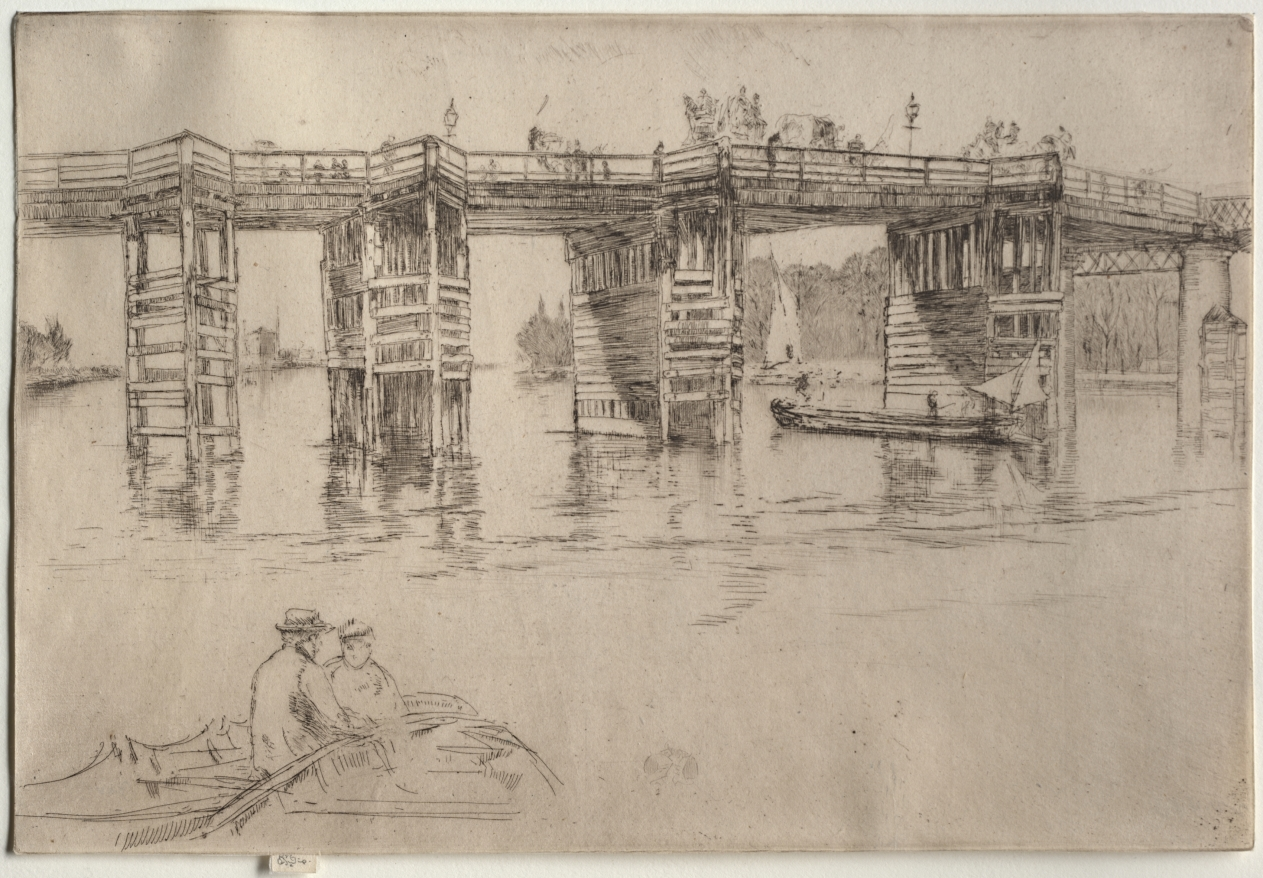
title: Old Putney Bridge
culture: America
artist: James McNeill Whistler (American, 1834–1903)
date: 1879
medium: etching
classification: Print